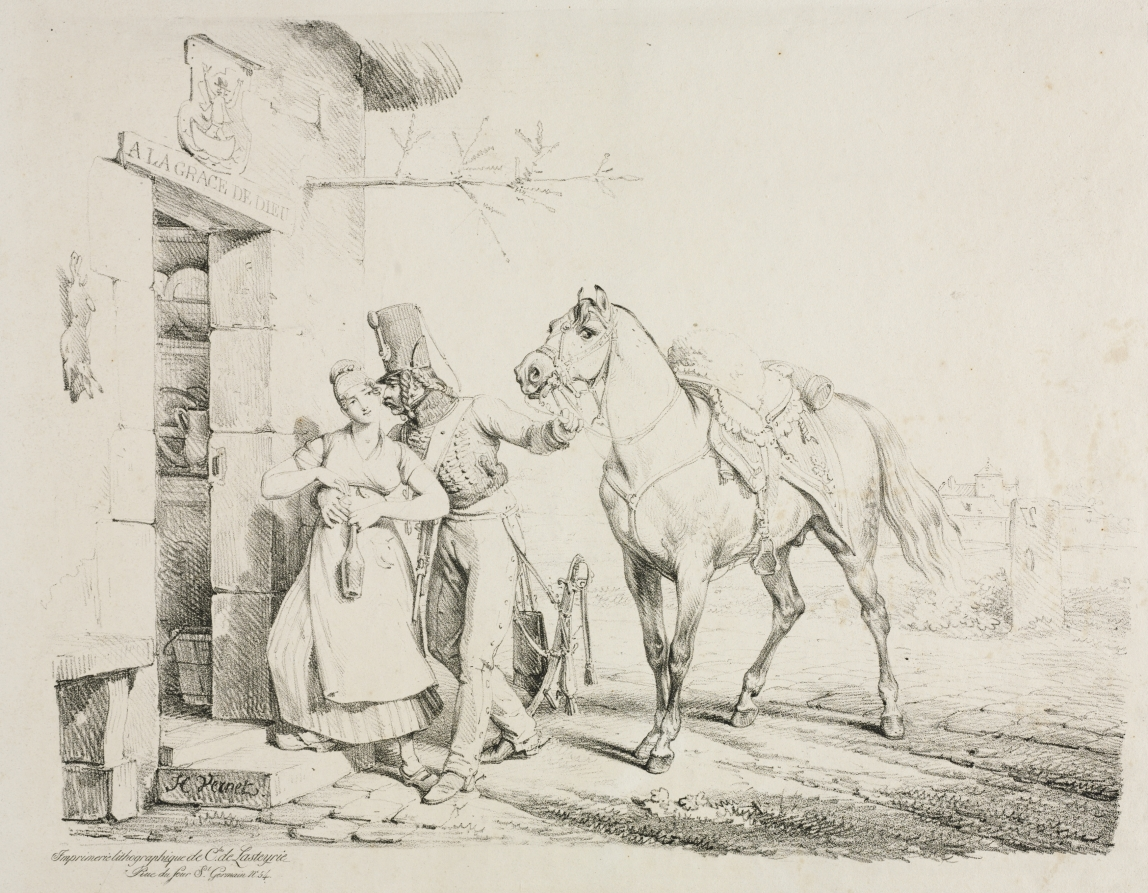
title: Hussar at the Door of a Cabaret, or Hussar Embracing a Servant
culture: France, 19th century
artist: Horace Vernet (French, 1789–1863)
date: 1817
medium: lithograph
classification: Print